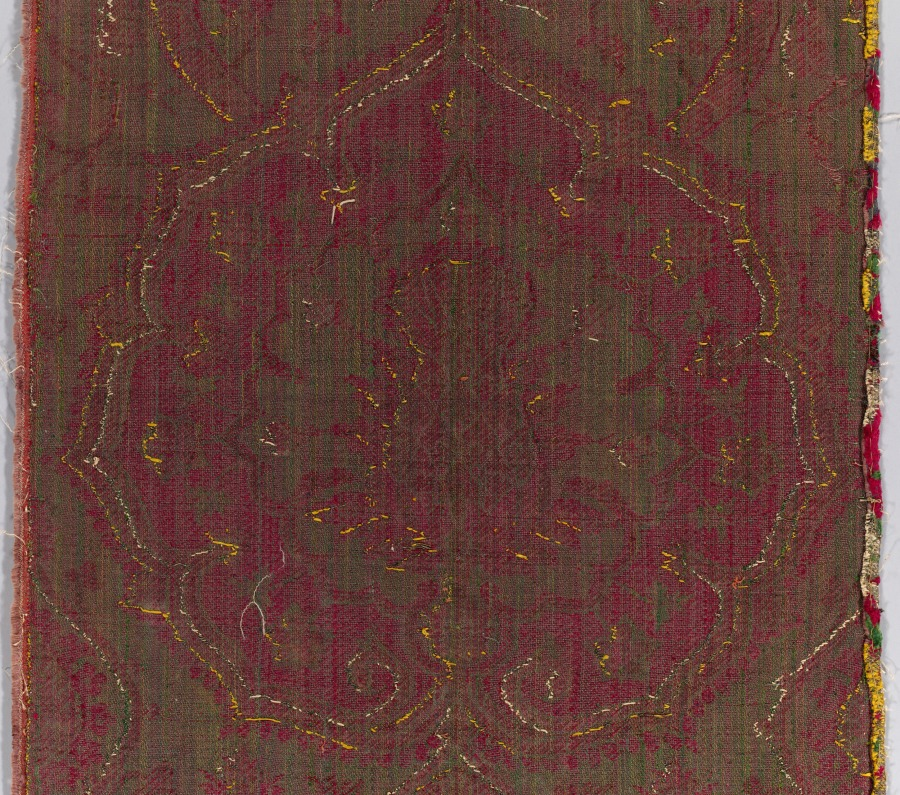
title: Brocaded Velvet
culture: Turkey, early 16th Century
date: c. 1500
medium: velvet: silk, brocaded with gold and silver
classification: Velvet